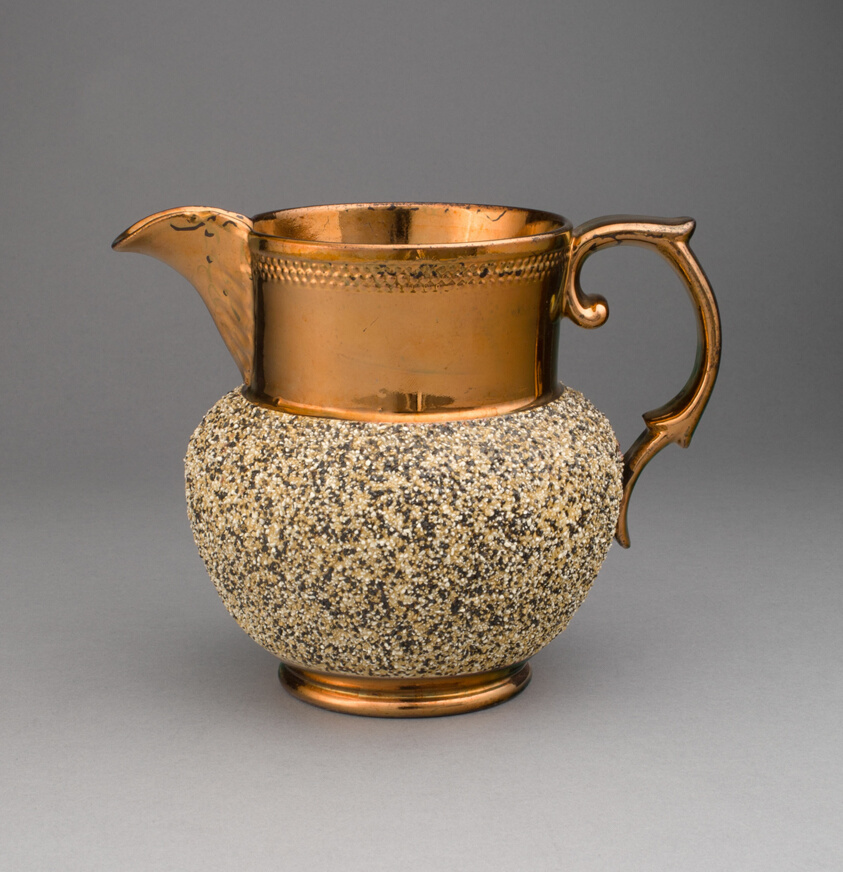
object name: Ceramics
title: Pitcher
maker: England, Staffordshire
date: 1810/20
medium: Lead-glazed earthenware with lustre decoration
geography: Staffordshire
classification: pitcher (vessel); earthenware; vessel; european decorative arts; ceramics